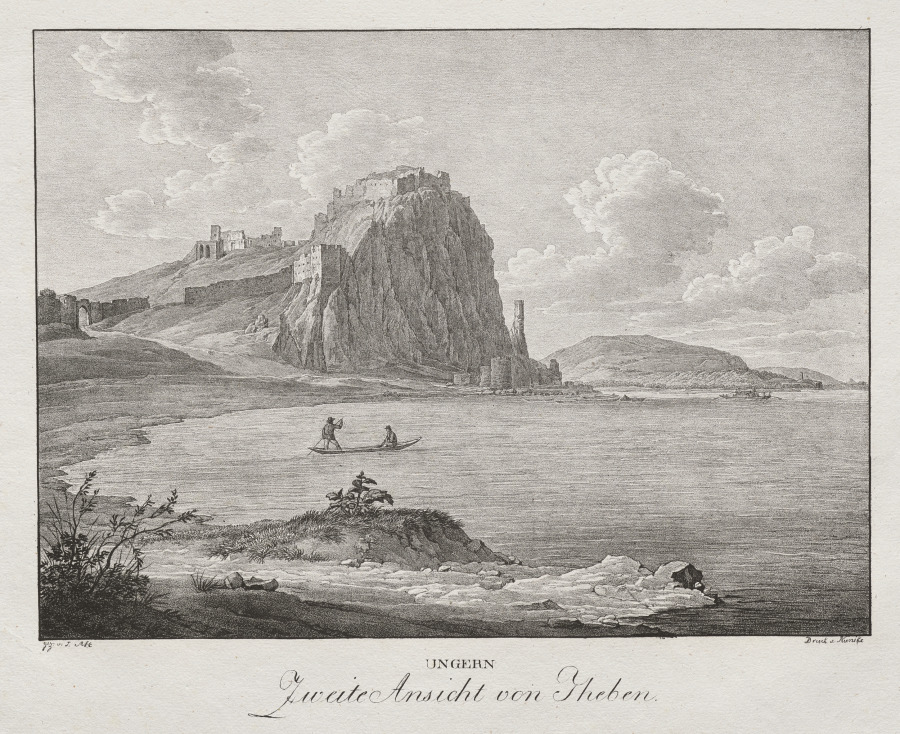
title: Ungern, Zweite Ansicht von Theben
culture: Austria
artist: Jakob Alt (Austrian, 1789–1872)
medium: lithograph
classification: Print